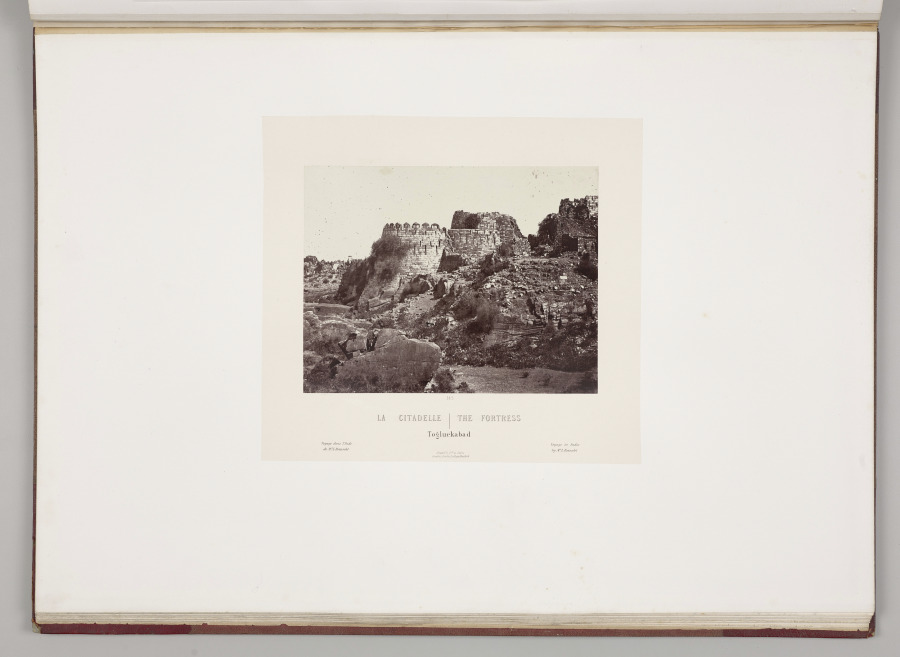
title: The Fortress, Togluckabad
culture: France, 19th century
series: India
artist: Louis-Théophile Marie Rousselet (French, 1845–1929)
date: 1865–68, published 1869–70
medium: Albumen print from glass plate negative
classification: Photograph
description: Concerned that his drawings did not do justice to the splendor of India’s monuments, Rousselet learned photography in India that year, a remarkable accomplishment. He proved to be a talented photographer with a sophisticated sense of composition. The scenes in this volume sweep across sites of Sultanate, Rajput, and Mughal power in northern India, from the sacred Hindu city of Varanasi on the Ganges River to Alwar in Rajasthan. Also included are several scenes of industry and portraits of Indian rulers.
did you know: Louis Rousselet described himself as a “scientific traveler” when he went to India alone at age 18 in 1863 and stayed into 1868.